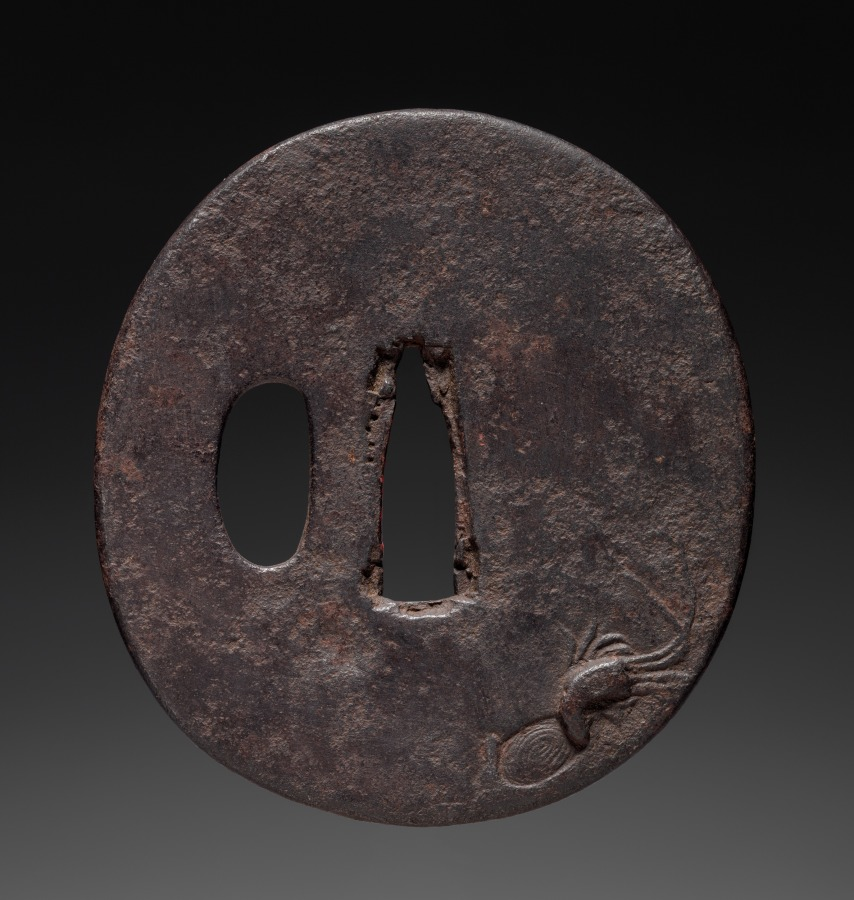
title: Sword Guard (Tsuba) with Hermit Crab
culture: Japan, possibly Edo period (1615-1868)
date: c. 1615–1868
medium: iron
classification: Arms and Armor